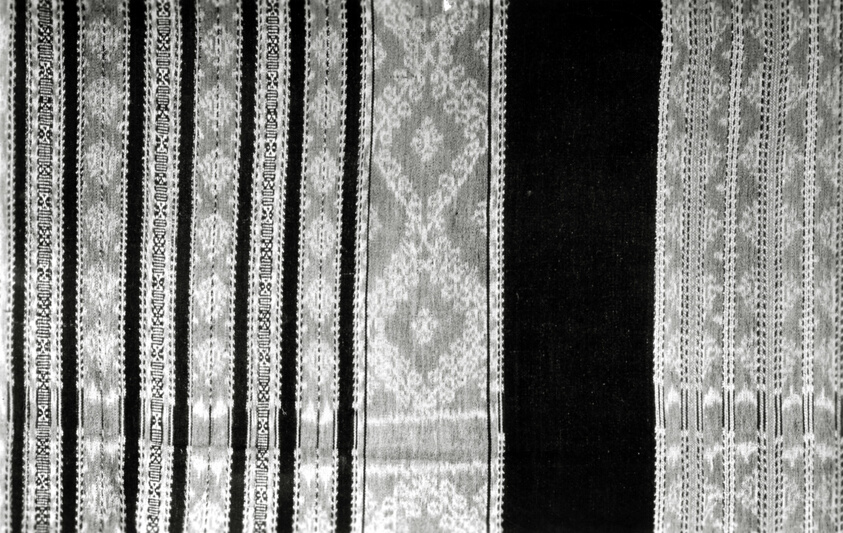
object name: Textile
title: Tapis Sarong (Skirt)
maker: Indonesia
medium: Cotton, ikat dyed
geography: Indonesia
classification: textile; weaving; costume